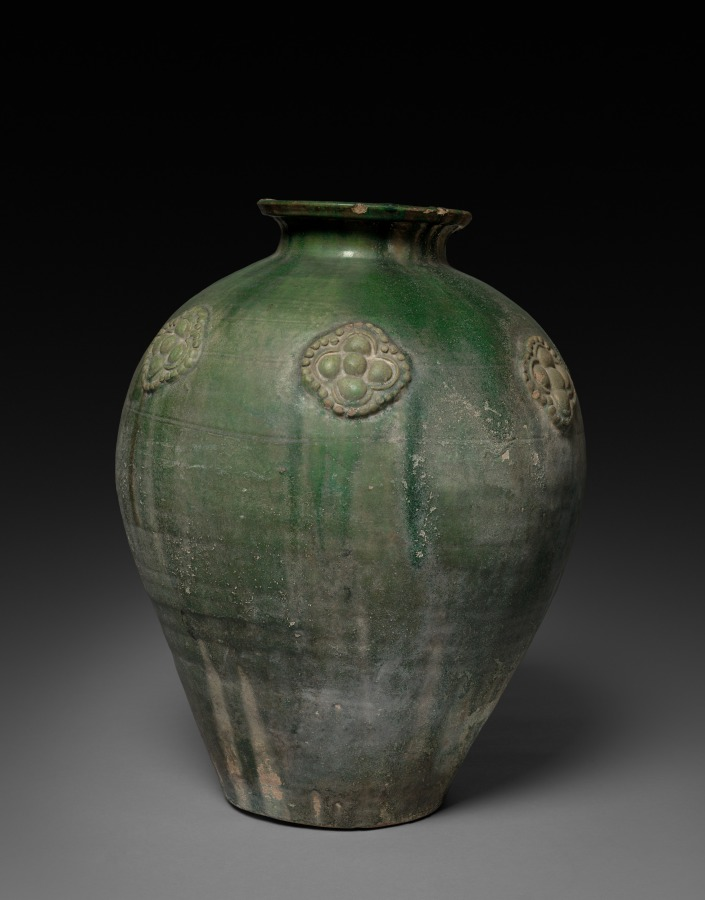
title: Jar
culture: China, Six Dynasties period (265-589) or Sui dynasty (581-618)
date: 500s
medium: glazed earthenware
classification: Ceramic